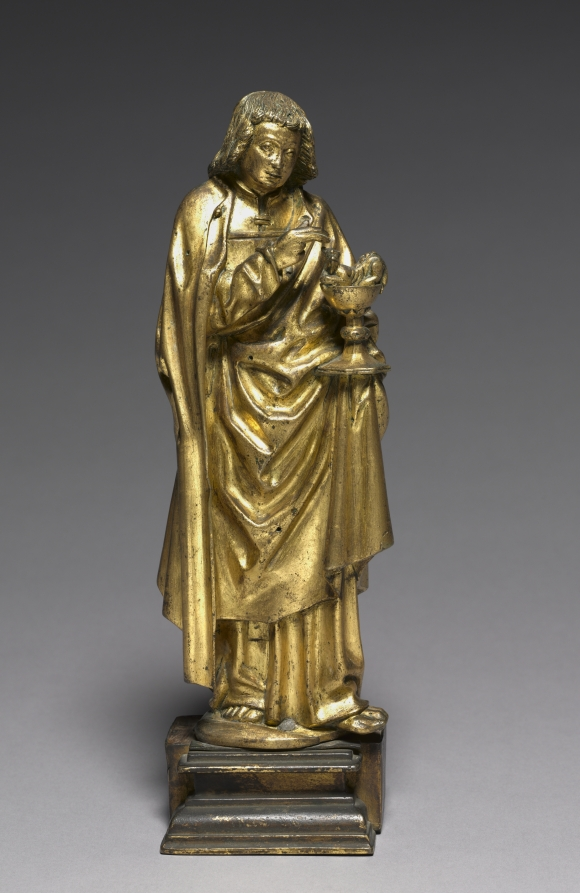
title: Saint John the Evangelist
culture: South Netherlands, probably Malines, 15th century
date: 1450–1475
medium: gilt bronze or brass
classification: Sculpture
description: The saint holds the legendary chalice, a poisoned cup, from which emerges a dragon, representing the serpent (Satan), recalling the incident in which John was forced to drink poison to test the power of his faith. John survived the test unharmed. It has been suggested that this statuette derives from a large multitiered baptismal font with niche figures in the Church of Notre-Dame in the town of Hal.